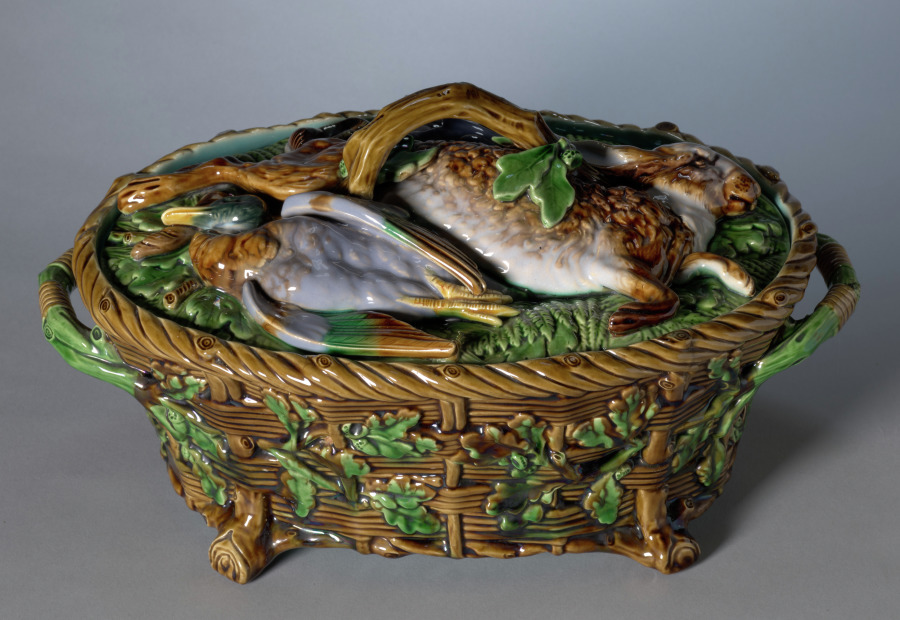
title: Game Pie Dish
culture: England, 19th century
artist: Minton Pottery and Porcelain Factory (British)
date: c. 1860–80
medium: earthenware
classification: Ceramic